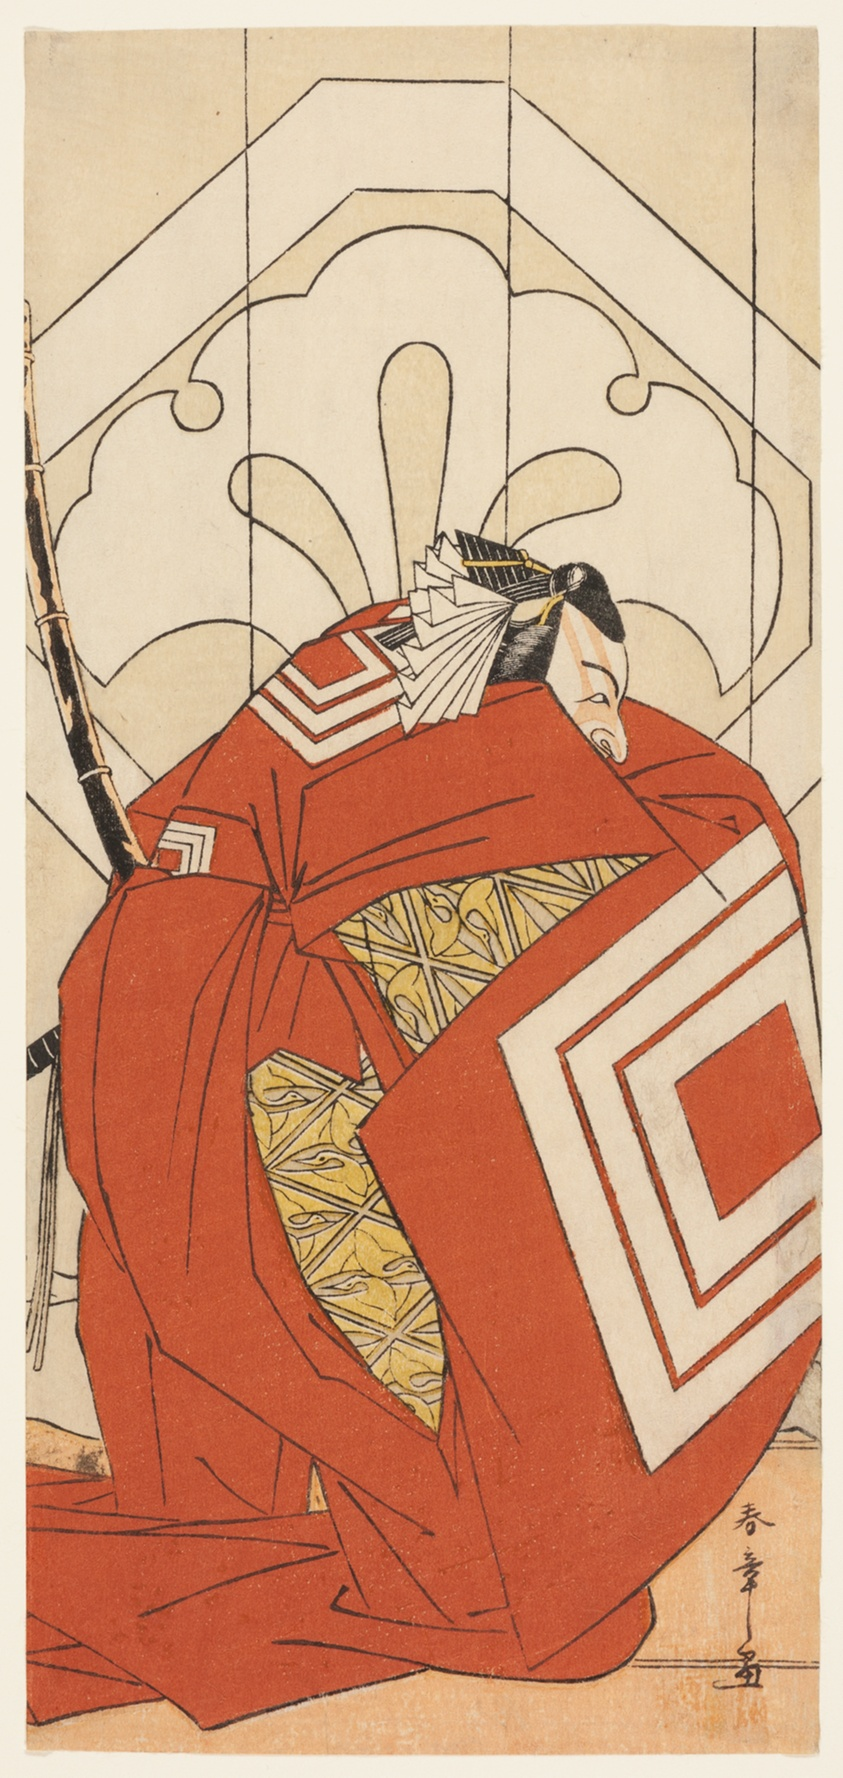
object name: Print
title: The Actor Ichikawa Danjuro V in a "Shibaraku" Role, Probably as Kato Hyoeisa Shigemitsu, in the Third Scene of the Play Masakado Kammuri no Hatsuyuki (The First Snow on Taira no Masakado's Court Headdress), Performed at the Nakamura Theater in the Eleventh Month, 1777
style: Japanese (culture or style)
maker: Katsukawa Shunsho 勝川 春章; Japanese, 1726-1792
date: c. 1777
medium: Color woodblock print; hosoban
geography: Japan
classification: woodblock print; print; asian art